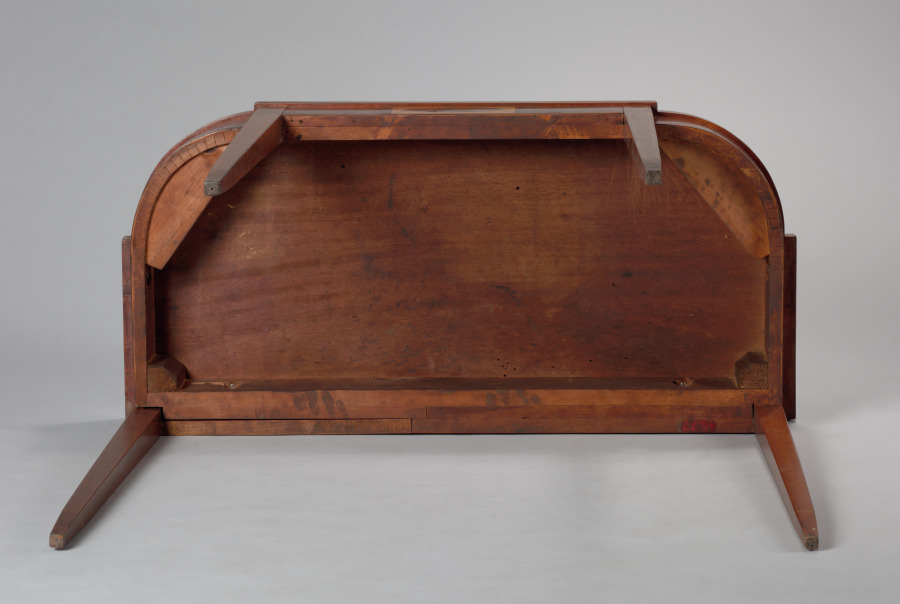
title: Table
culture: America, Sheraton Type, early 19th century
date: early 1800s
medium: mahogany with inlays of various woods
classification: Furniture and woodwork